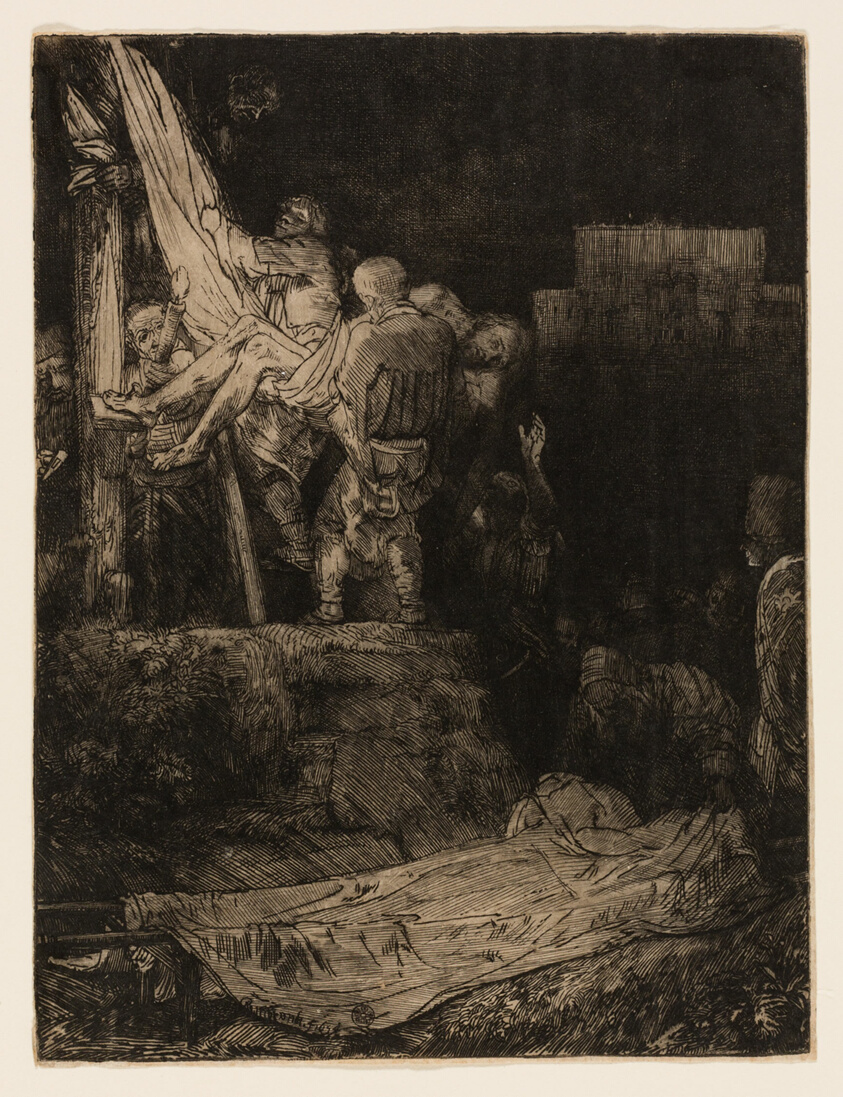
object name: Print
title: The Descent from the Cross by Torchlight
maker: Rembrandt van Rijn (Dutch, 1606-1669)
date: 1654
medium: Etching and drypoint on ivory Japanese paper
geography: Netherlands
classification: etching; print; prints and drawing; paper; drypoint